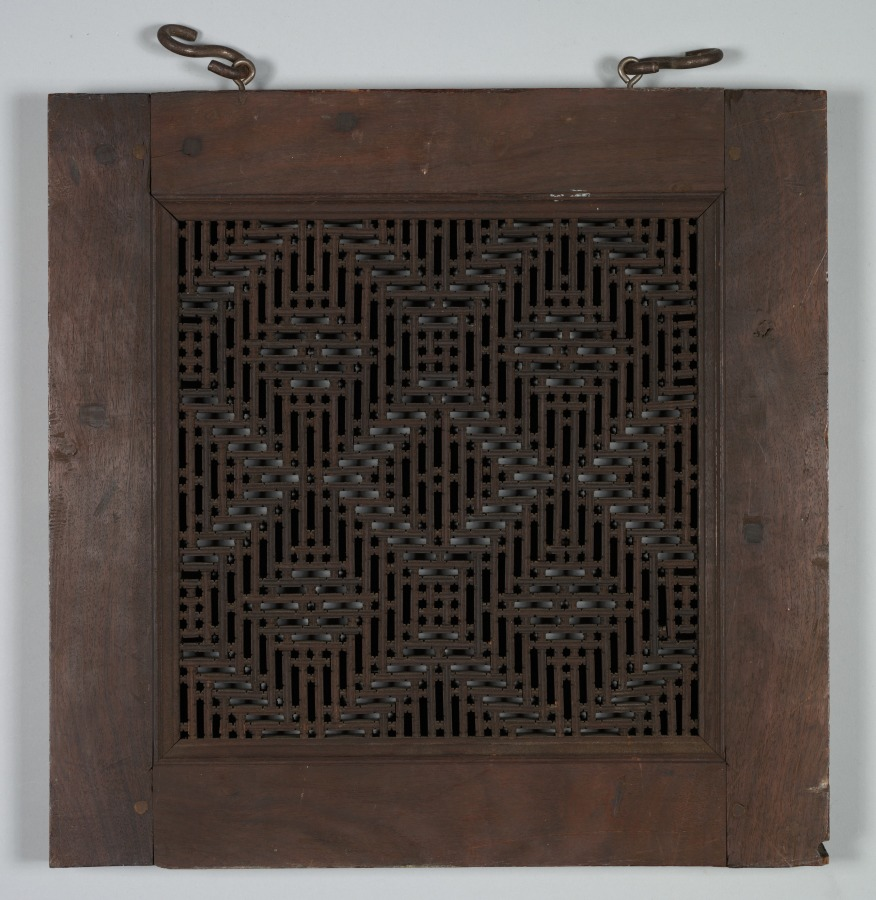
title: Panel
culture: Syria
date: 1800s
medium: wood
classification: Wood